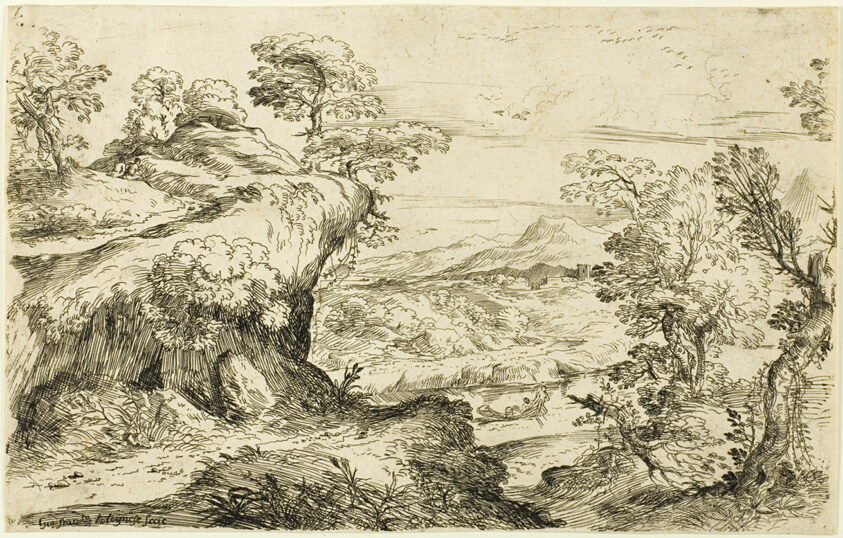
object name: Print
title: Two Men on a Mountain Top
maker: Giovanni Francesco Grimaldi (Italian, 1606-1680)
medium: Etching on paper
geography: Italy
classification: etching; print; prints and drawing